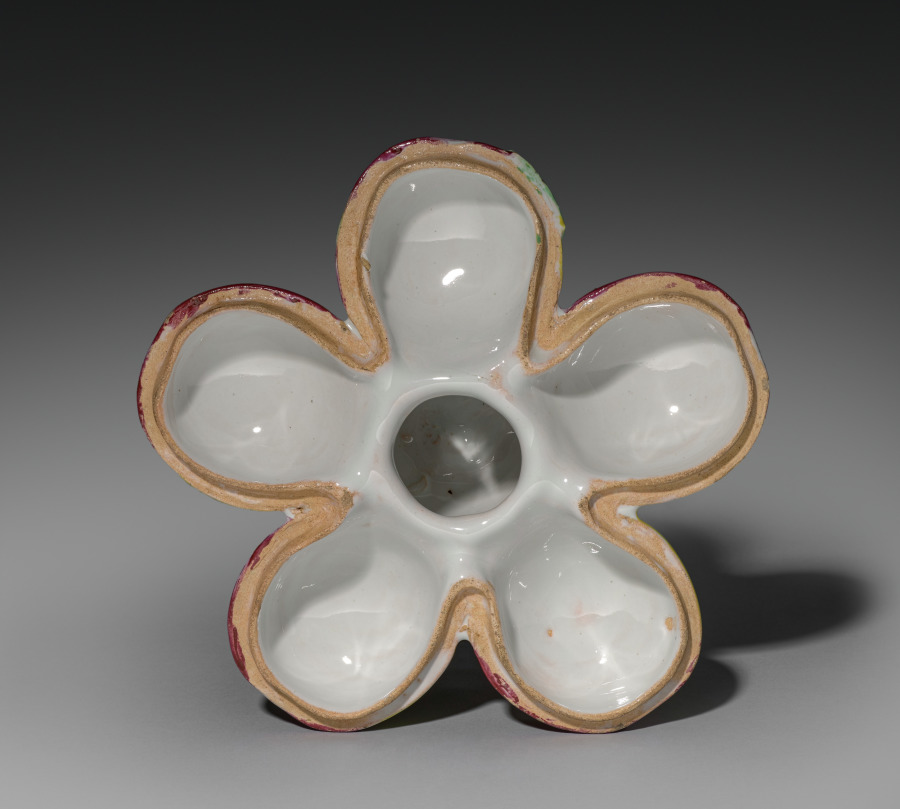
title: Cover for a Box in the Form of Apples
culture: France, 18th century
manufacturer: Sceaux Factory (French, active 1748–66)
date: c. 1760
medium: Tin- glazed earthenware (faience) wth enamel decoration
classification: Ceramic